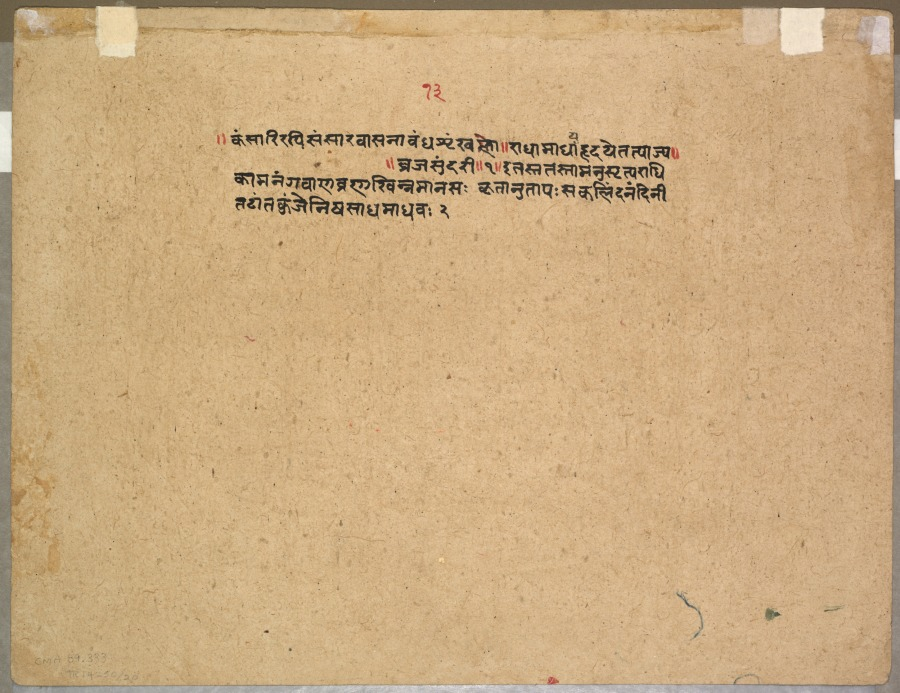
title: Krishna’s longing for Radha, from a Gita Govinda (Song of the Cowherd) of Jayadeva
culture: Northern India, Pahari kingdoms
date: c. 1820–25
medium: Gum tempera and gold on paper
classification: Painting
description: In the lush forests on the banks of India’s Yamuna River, the youthful god Krishna waits to rendezvous with his beloved Radha. The artist has rendered his impatience by showing seven Krishnas, in various attitudes of anxious waiting, as though seeing him over a period of time. Meanwhile Radha, dressed in yellow at top right, confers seemingly endlessly with her confidante, as she tries to decide whether she should meet Krishna for the illicit tryst—she is already married and Krishna is prone to flirting with other girls. This scene is a metaphor for how god waits for us to come to him, while the human devotee frets about the bonds of social norms.